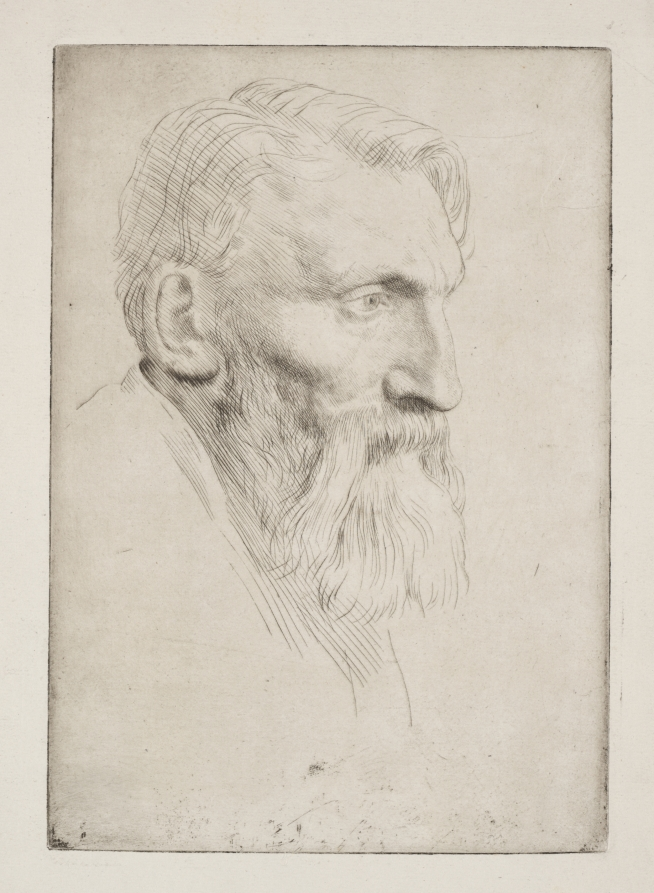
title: Auguste Rodin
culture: France, 19th century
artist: Alphonse Legros (French, 1837–1911)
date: c. 1857–1911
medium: drypoint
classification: Print